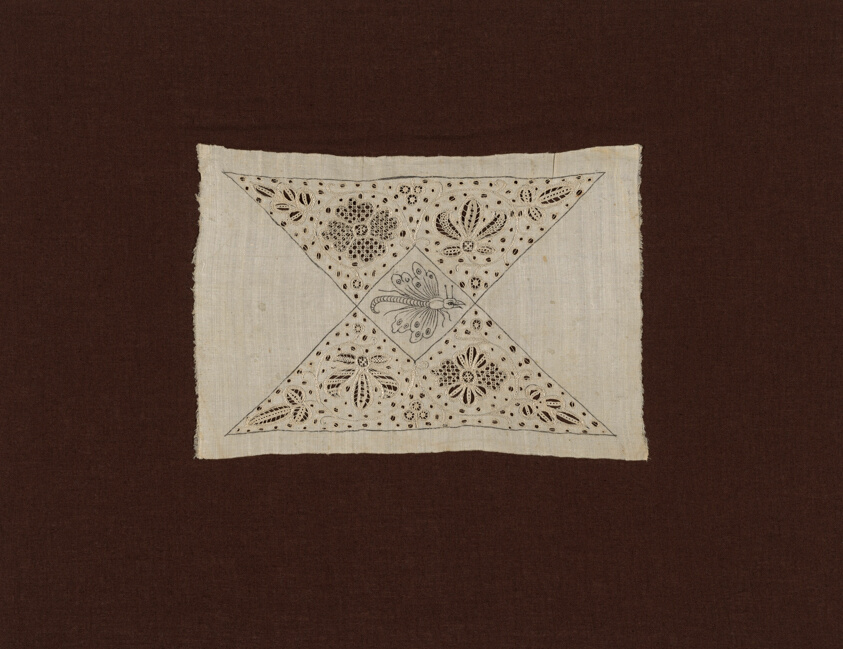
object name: Textile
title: Insertion from a Table Cloth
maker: England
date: 1601/25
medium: Linen, plain weave; ink drawing; embroidered with silk and linen in chain and running stitches; cut and drawn work embroidered with linen in buttonhole, overcast, and Russian overcast stitches; with needle lace filling stitches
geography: England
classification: textile; needlework (visual works)